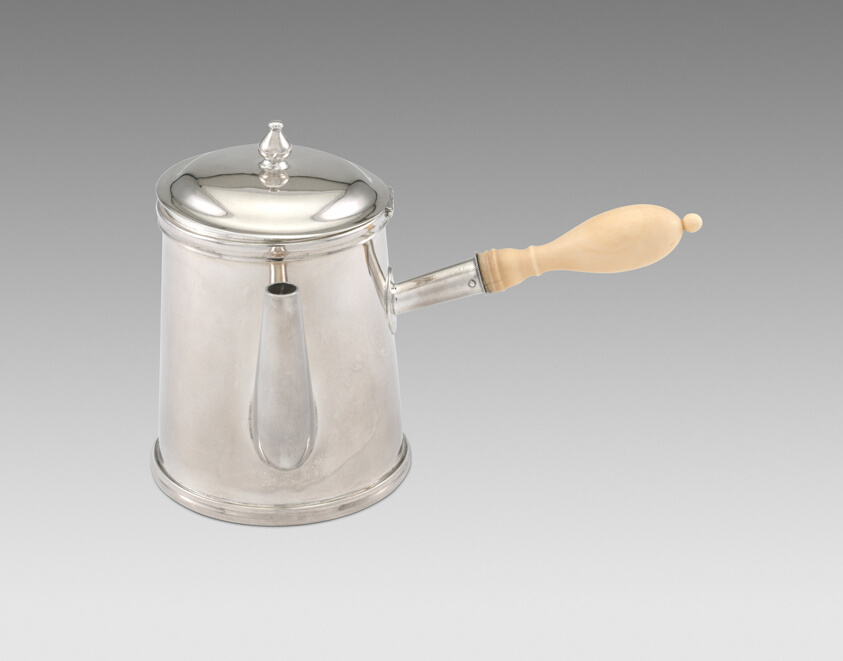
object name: Metalwork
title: Chocolate Pot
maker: Jones, Ball & Poor; American, 1846–1853; Boston Massachusetts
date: c. 1846–53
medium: Silver and ivory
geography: Boston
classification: chocolate pot; silver; vessel for serving drinks; american decorative arts; american arts; decorative arts